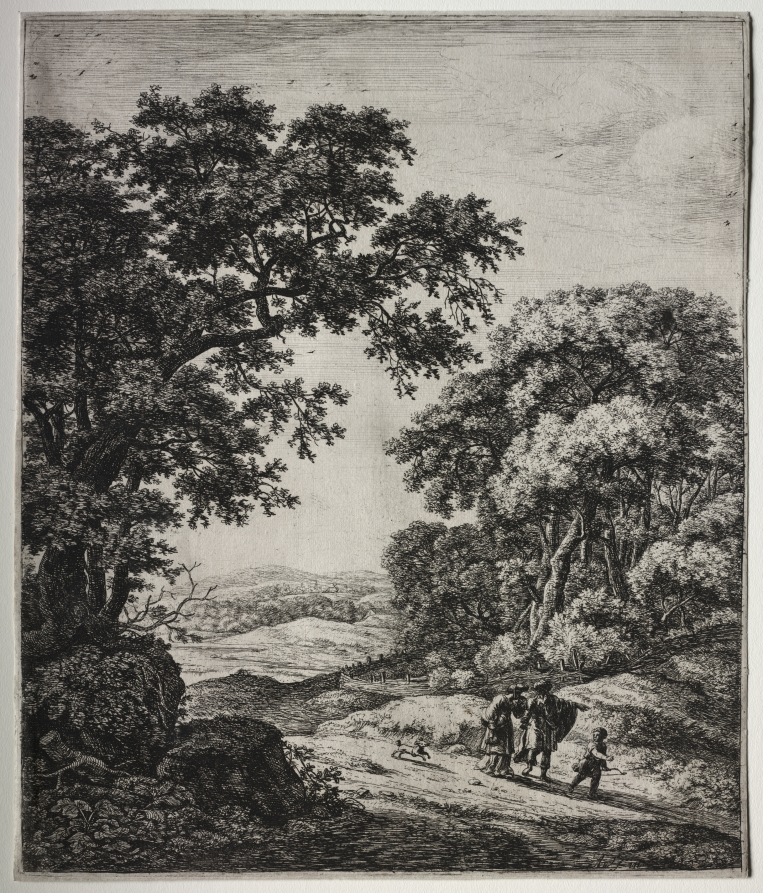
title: Six large upright landscapes with scenes from the Old Testament: Abraham Dismissing Hagar and Ishmael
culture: Netherlands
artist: Anthonie Waterloo (Dutch, 1609/10–1690)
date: 1640–90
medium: etching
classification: Print